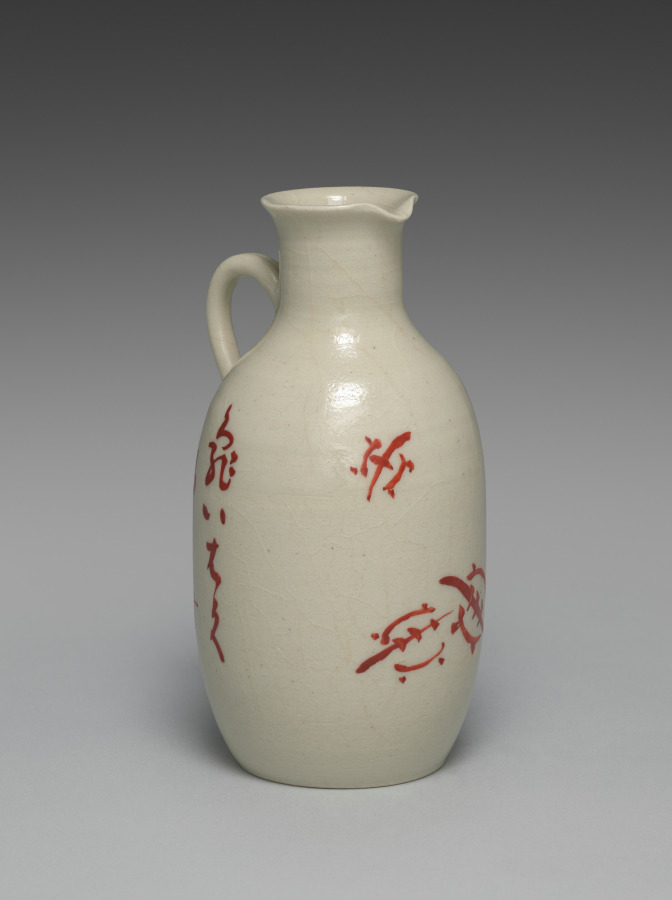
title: Tortoises Sake Pourer from Sake Pourers with Crane and Tortoises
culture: Japan, Meiji period (1868–1912)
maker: Seifū Yohei III (Japanese, 1851–1914)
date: 1893–1914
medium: One of a pair of sake flasks; porcelain with overglaze color enamel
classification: Ceramic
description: This flask has stencil-like paintings of three turtles—a young one with its parents—while the other in this pair has a crane with a leg raised. Cranes and turtles are well-recognized symbols of longevity in East Asia, with the turtle said to live for ten thousand years and the crane for one thousand. Each flask also has a poem on the back, one in Chinese and the other in Japanese. The latter, which appears on the turtle flask, reads kame iwaku kamiyo wa, ore no wakaki toki. The seventeen syllable poem begins with “turtle” and ends with “when I was young.” It can be translated as, “the turtle said the world of the gods began when I was young.”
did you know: This pair of seemingly humble sake pourers celebrate longevity and delight in a literary tradition that embraces multiple forms of poetic expression.